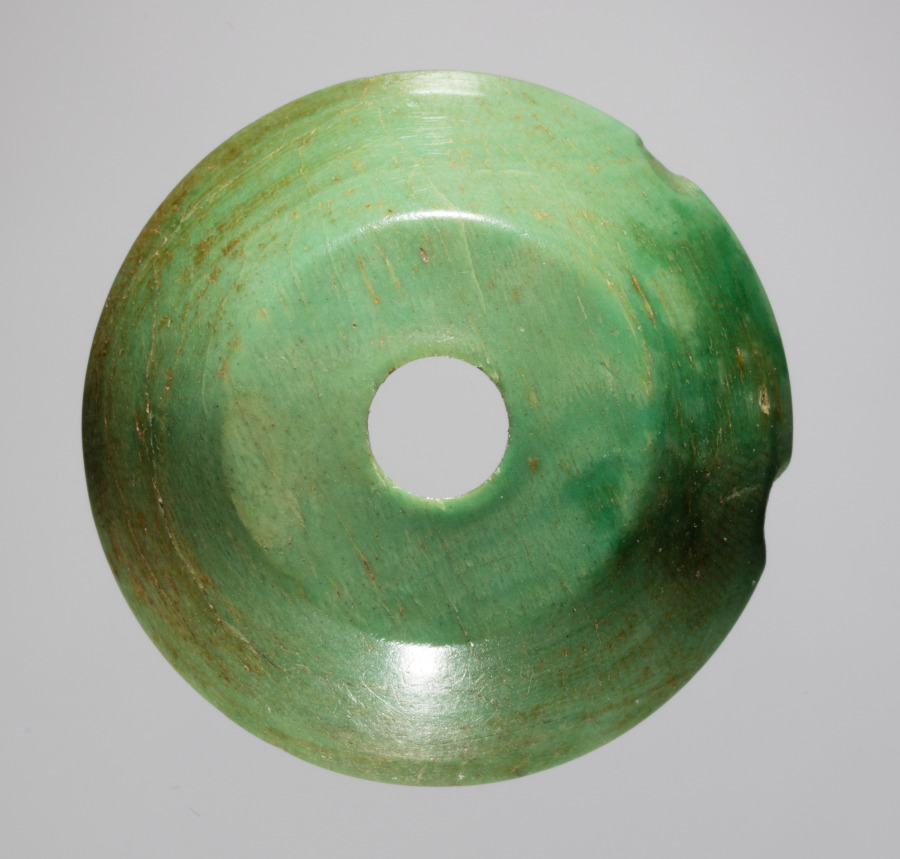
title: Spindle Whorl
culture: Iran, early Islamic period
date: 700s - 900s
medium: bone, incised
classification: Spindle Whorl